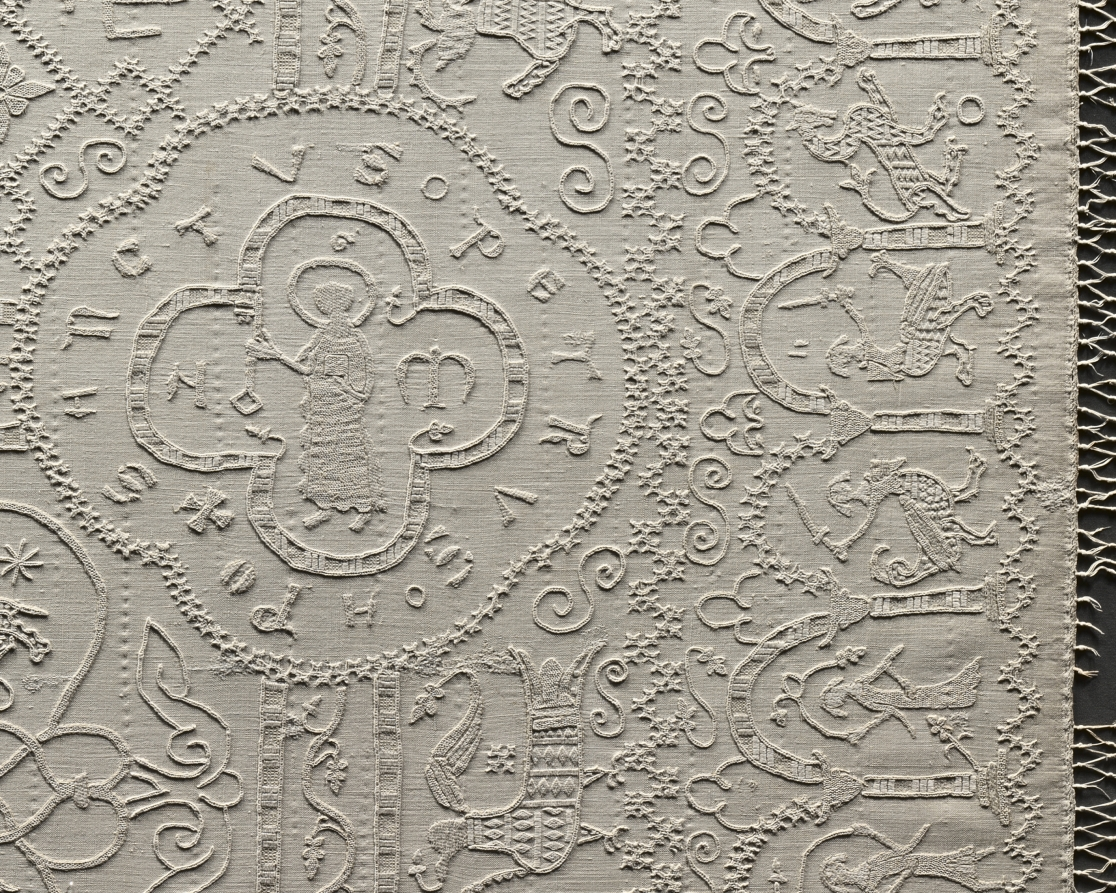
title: Altar Cloth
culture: Germany, Altenberg on the Lahn, Premonstratensian Convent, 14th century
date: c. 1350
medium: embroidery: linen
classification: Embroidery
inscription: various motifs enclosed in quatrefoils with identifying inscriptions in Gothic letters.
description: This large, embroidered altar cloth is one of the rarest, most important medieval church furnishings in existence. It was stitched by nuns in the Premonstratensian Convent in Altenberg on the Lahn River, north of Frankfurt, Germany, and was used to cover the church’s high altar in the weeks leading up to Easter. The cloth is an example of linen embroidery, a specialty of German nuns in the later Middle Ages. The Altenberg monastery church once had valuable furnishings; the high altar retable (a decorated frame with sculptures and paintings on the top of an altar) has survived, the main parts of which are now in the Städel Museum in Frankfurt, Germany.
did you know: When lit from behind, the previously hidden details emerge and the complex design becomes evident.